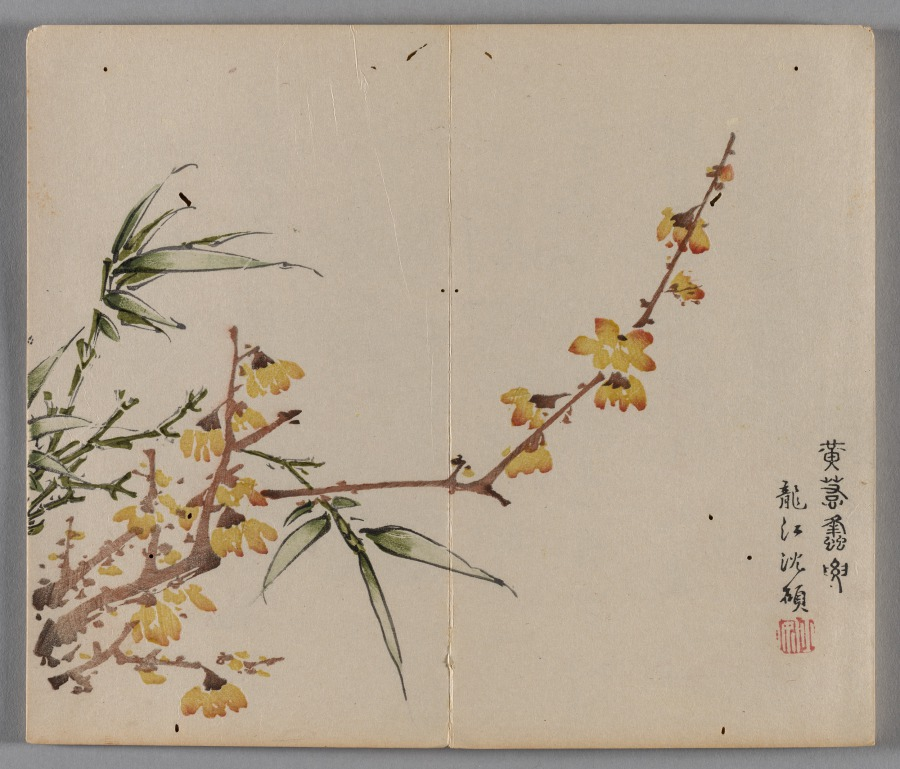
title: Ten Bamboo Studio Painting and Calligraphy Handbook (Shizhuzhai shuhua pu): Plum Blossoms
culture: China, Qing dynasty (1644-1911)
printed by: Hu Zhengyan (Chinese, c. 1584–1674)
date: 1633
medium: Woodblock-printed book; ink and colors on paper; first edition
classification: Print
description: Color printing reached a level of perfection in the early 1600s, as seen in this Ten Bamboo Studio Collection of Calligraphy and Painting and the Mustard Seed Garden Manual of Painting (printed 1679 and 1701). The painterly quality, precision in registering (aligning) the woodblocks, and harmonious colors made them the most successful color print editions in Chinese history. Both editions were printed and compiled in Nanjing, spread nationwide, and had a great impact on the arts in Japan and Korea.